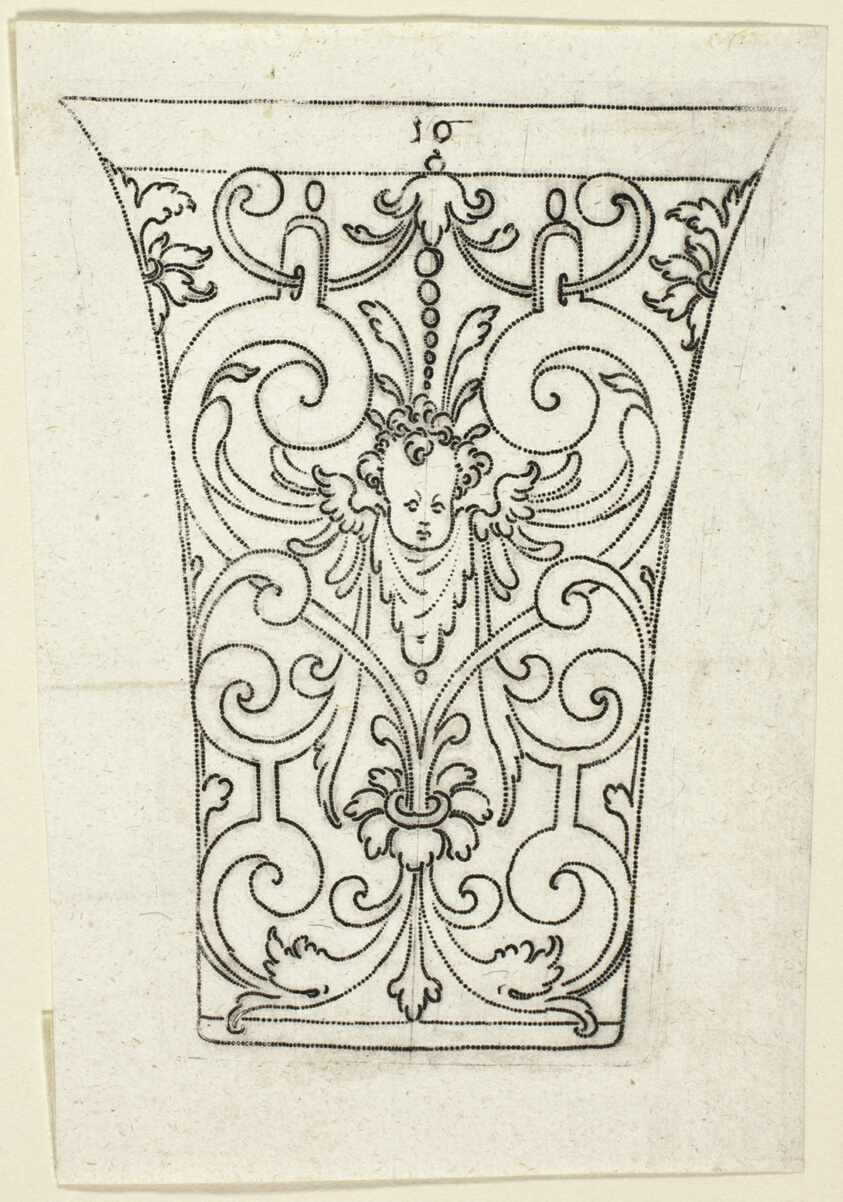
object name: Print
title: Plate 10, from XX Stuck zum (ornamental designs for goblets and beakers)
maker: Master A.P. (German, active early 17th century)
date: 1601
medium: Punch engraving in black on ivory laid paper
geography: Germany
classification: engraving; print; prints and drawing